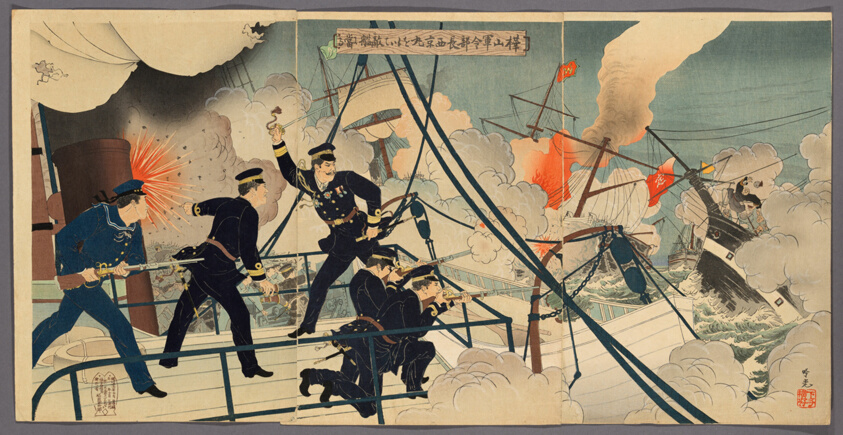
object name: Print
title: Kabayama, the Chief of Naval Staff, Attacking Enemy Ships from onboard Saikyomaru (Kabayama gunreibucho Saikyomaru o motte tekikan ni ataru)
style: Japanese (culture or style)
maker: Adachi Ginko (Japanese, active c. 1874-97)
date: 1894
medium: Color woodblock print; oban triptych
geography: Japan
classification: woodblock print; print